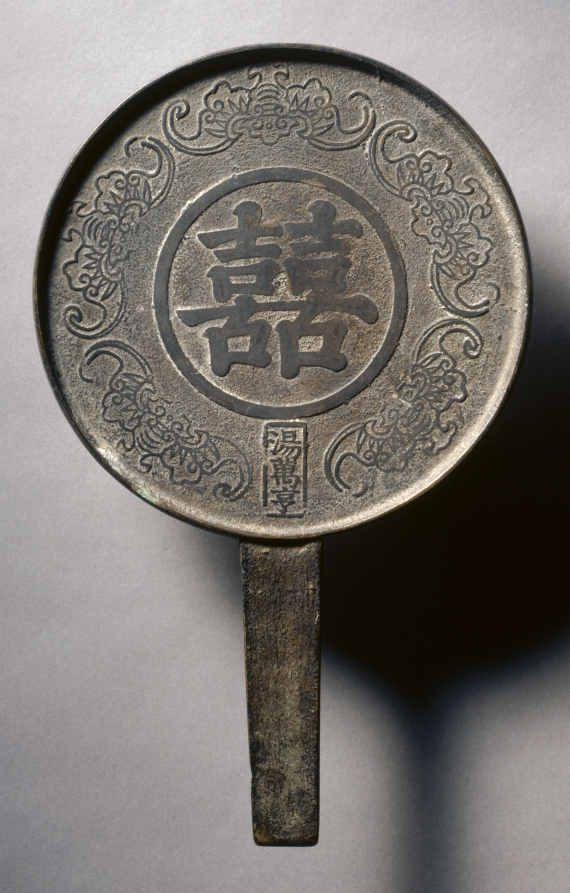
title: Mirror with Handle, Decorated with "Double Happiness" and Five Bats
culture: China, Qing dynasty (1644-1911)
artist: workshop of Tang Wanheng (Chinese, active c. 1800)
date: c. 1800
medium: brass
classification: Metalwork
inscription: 雙喜， 湯萬亨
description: This mirror bears a large character of xi 囍 ("double happiness," as in a marriage) as its principal decoration. Below that, a smaller inscription in a rectangular frame establishes the mirror maker's identity. Tang Wanheng 湯萬亨 must have enjoyed a lucrative trade and sufficient renown to warrant the inclusion of his name on his products. It has been suggested that these mirrors were not so much made for reflective purposes as for ritualistic use during the marriage ceremony, hence the "double happiness" as its main decoration.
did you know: The five–bat design signals a wish for good fortune.